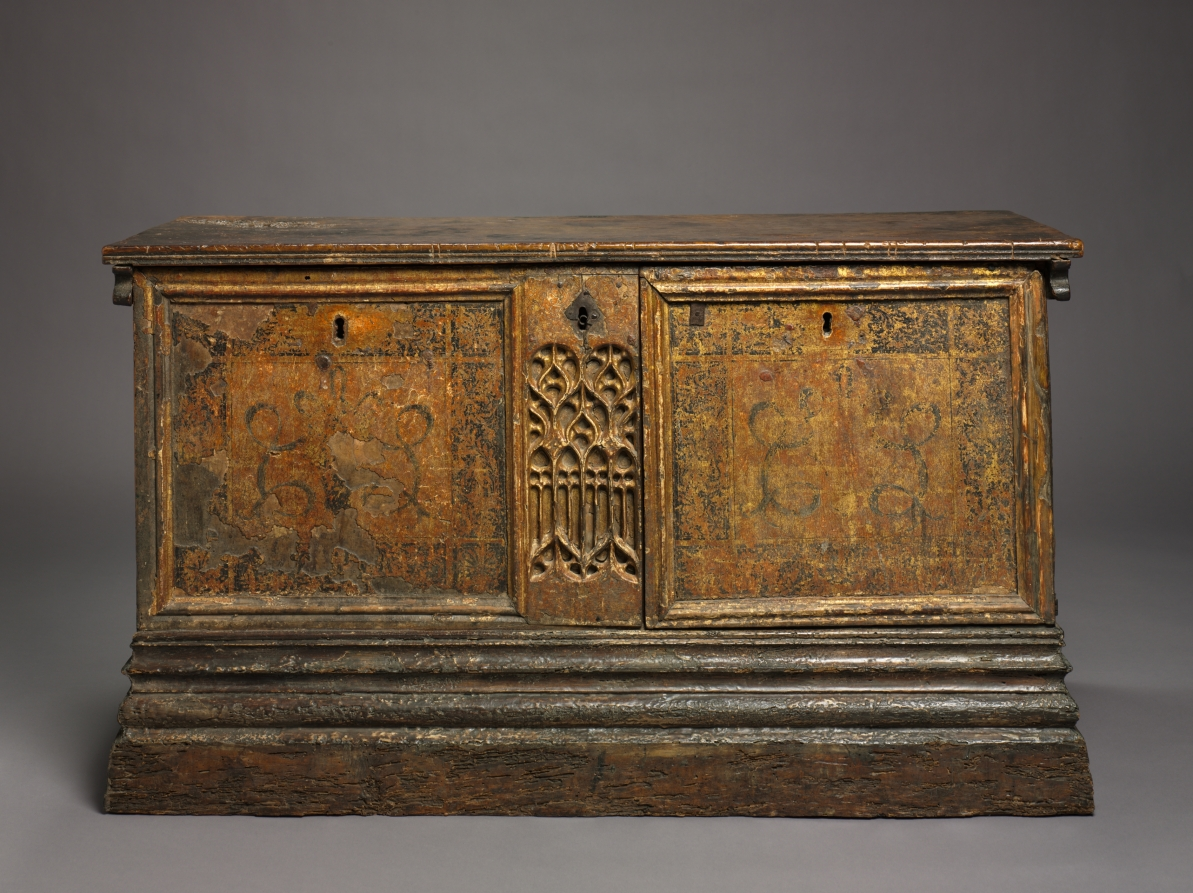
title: Marriage Chest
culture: Spain, Catalonia, Barcelona(?), early 16th century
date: c. 1500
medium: wood with painting and gilding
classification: Furniture and woodwork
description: Elaborately carved chests were given by husbands to their wives on the occasion of the wedding. Inside the home, such chests were used for the storage of clothing and were elaborately painted and gilded. This chest is an example of a type produced in Barcelona from the late 1400s onward.